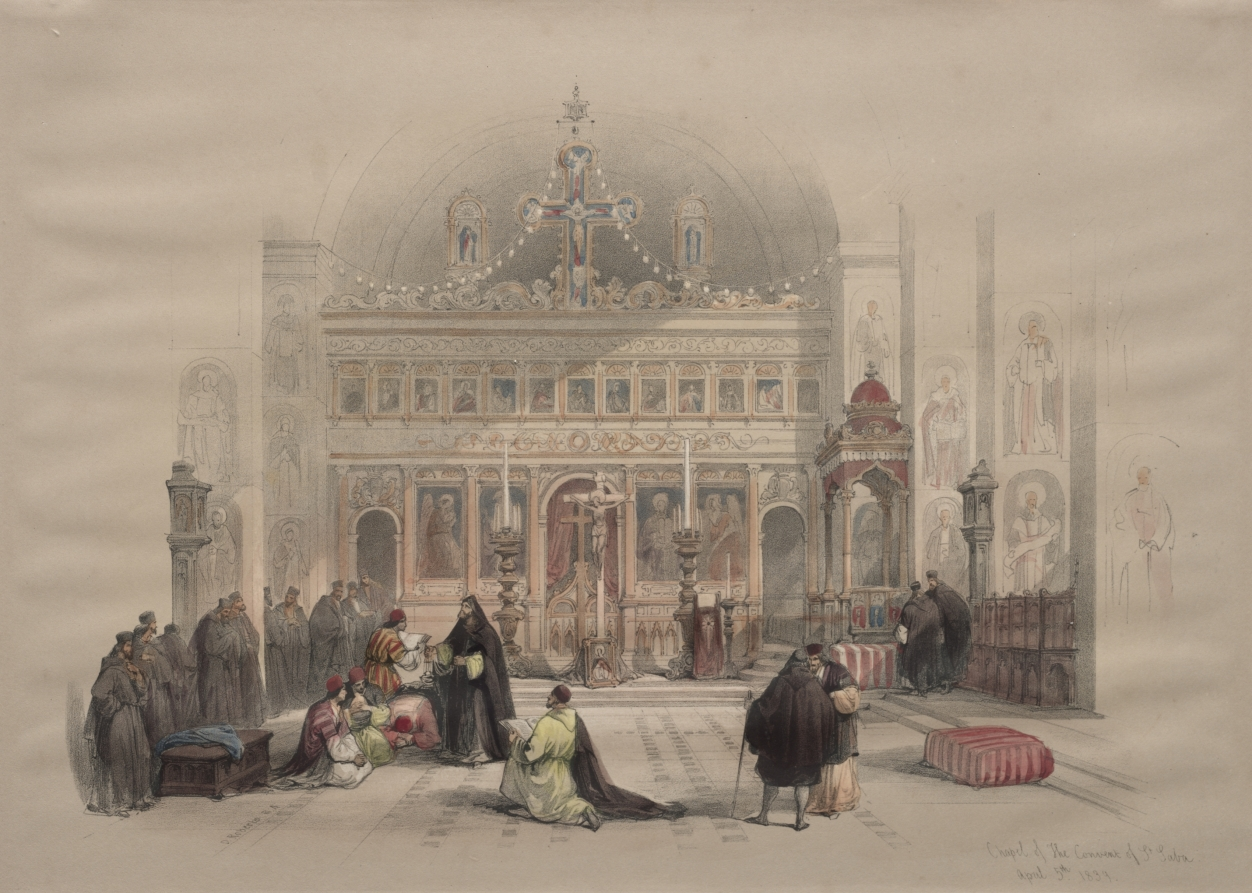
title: Chapel of the Convent of St. Saba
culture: England, 19th century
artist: David Roberts (Scottish, 1796–1864)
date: 1839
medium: color lithograph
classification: Print